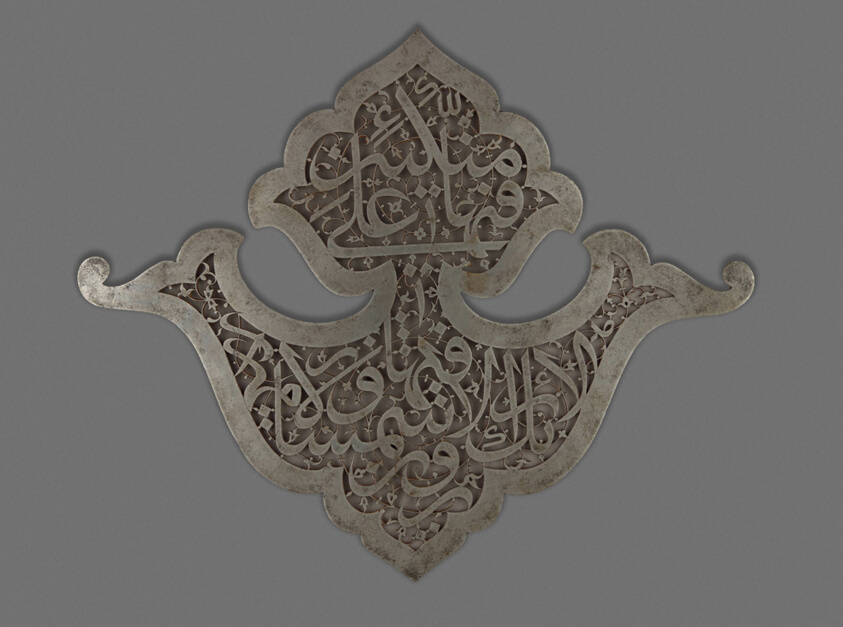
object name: Metalwork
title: Plaque with Qur'anic Inscription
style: isfahan, Islamic (culture or style)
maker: Iran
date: Safavid dynasty (1501–1736), 16th century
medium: Steel with pierced decoration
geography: Iran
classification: steel; metalwork; asian art; decorative arts